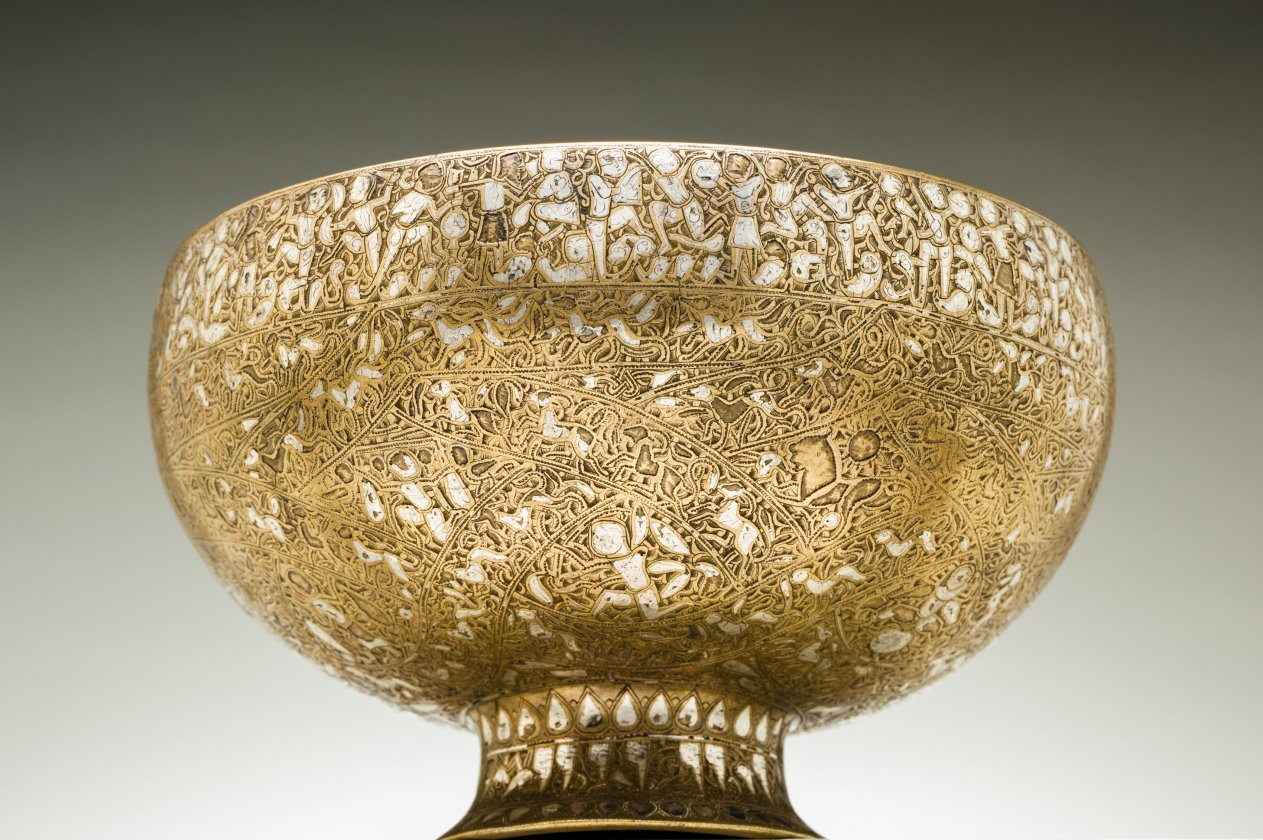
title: The Wade Cup with Animated Script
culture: Iran, Seljuq period of Iran (1037–1194)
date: 1200–1221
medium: brass inlaid with silver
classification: Metalwork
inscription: Glory, and success, and government, and bliss, and soundness, and peace of mind, and mercy, and well-being, and good health, and duration, and increase, and satisfaction, and care, and continuance to its owner.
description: The highlight of the cup’s decoration is the inscription around the rim, which you see on the walls around you, with letters composed of human figures, animals, and birds. This is known as animated script and it developed in northeast Iran or Afghanistan during the mid-1100s and migrated westward. The inscription on the rim of the Wade Cup is the pinnacle of this form of script with its full-figure animation. The body of the cup is covered with interlacing bands of compartments containing tiny figures of humans and animals. These represent the 12 signs of the zodiac from astrology, the practice of interpreting the influence of planets and stars on earthly affairs. Astrology began in Mesopotamia, was adopted by the Greeks, and then absorbed into medieval Islamic culture through translations of Greek texts.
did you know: This is known as the Wade Cup, after J. H. Wade who bequeathed the funds for its acquisition